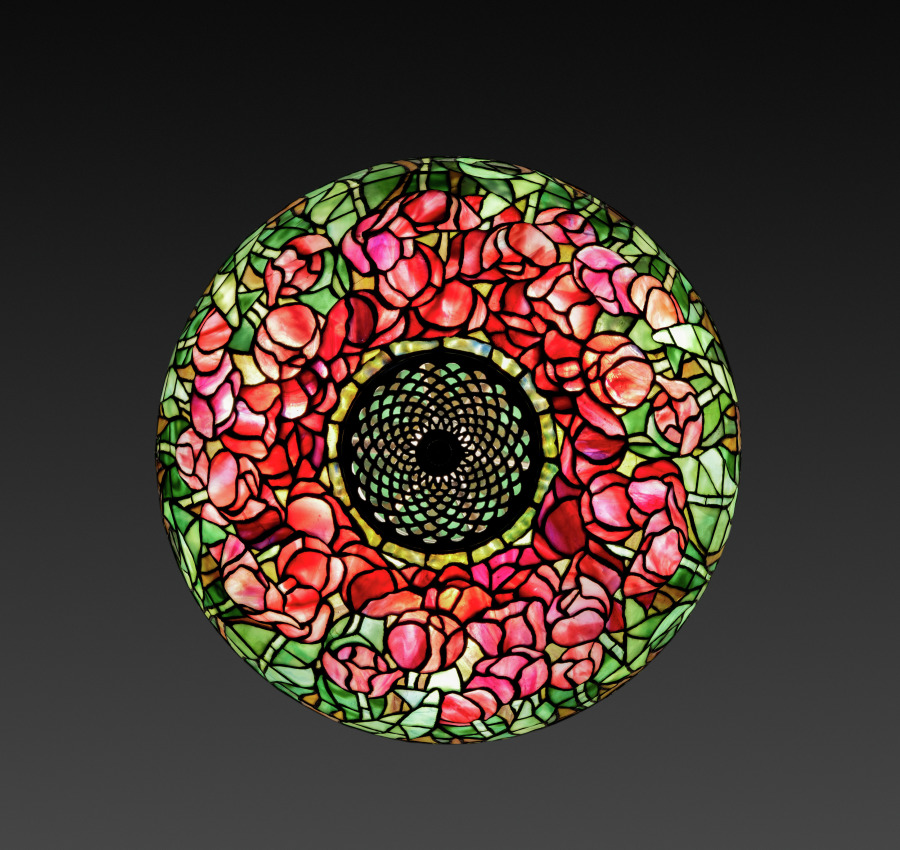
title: Tulip Table Lamp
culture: America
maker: Tiffany Glass & Decorating Company (America, New York, 1892–1902)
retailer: Tiffany Studios (United States, New York, 1902–32)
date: c. 1900–1906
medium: Leaded glass, blown glass, bronze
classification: Lamp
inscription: Shade impressed: TIFFANY STUDIOS NEW YORK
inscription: Base impressed: TGDCo/TIFFANY STUDIOS/NEW YORK/21667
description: In the 1870s a renewed emphasis on natural landscapes ushered in a generation of cottage gardeners who delighted in planting perennials in large quantities. Louis Comfort Tiffany was among those who championed the lush, sometimes wild-looking displays of varied floral species in the garden at his Long Island estate, Laurelton Hall. Tiffany encouraged his designers to take inspiration from his garden by shipping fresh cuttings almost weekly to his studios. Ohio native Clara Wolcott Driscoll and her team of female designers created floral patterns for lamps and mosaics based on the colorful blooms of spring that became among the most sought after and commercially successful of Tiffany’s production.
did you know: Many of Louis Comfort Tiffany's lamp shades such as this tulip version were designed in standard sizes so that they could be used on different bases.